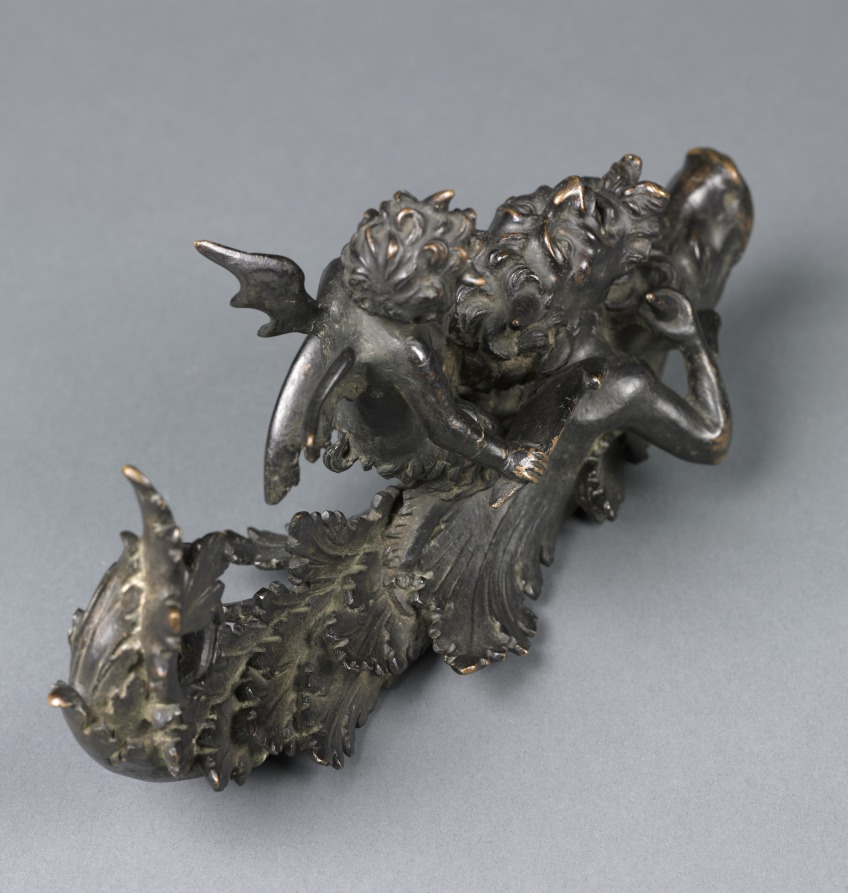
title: Doorknocker with Two Satyrs Riding an Ox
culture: probably Italy, Style of Padua, 16th Century, 19th century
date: 1800s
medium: bronze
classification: Sculpture